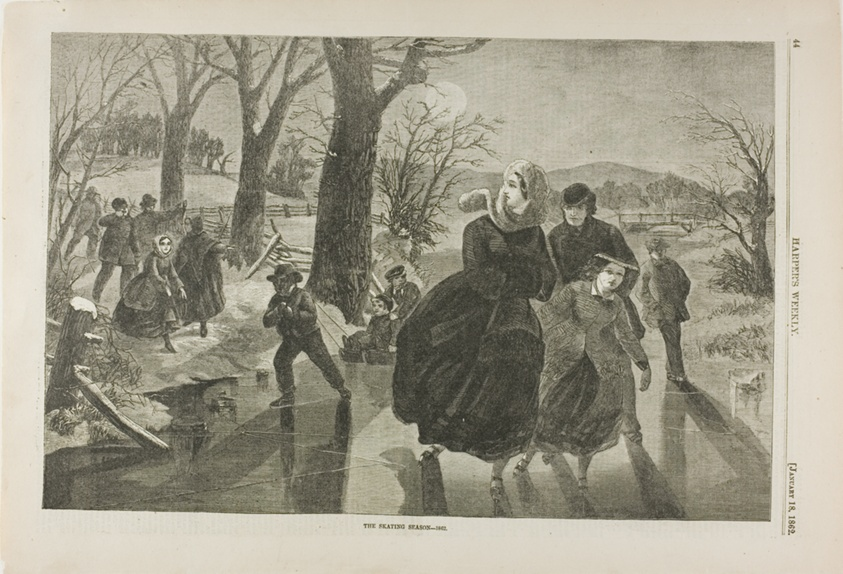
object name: Print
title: The Skating Season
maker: Winslow Homer (American, 1836-1910); published by Harper's Weekly (American, 1857-1916)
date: published January 18, 1862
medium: Wood engraving on paper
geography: United States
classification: wood engraving; print; prints and drawing